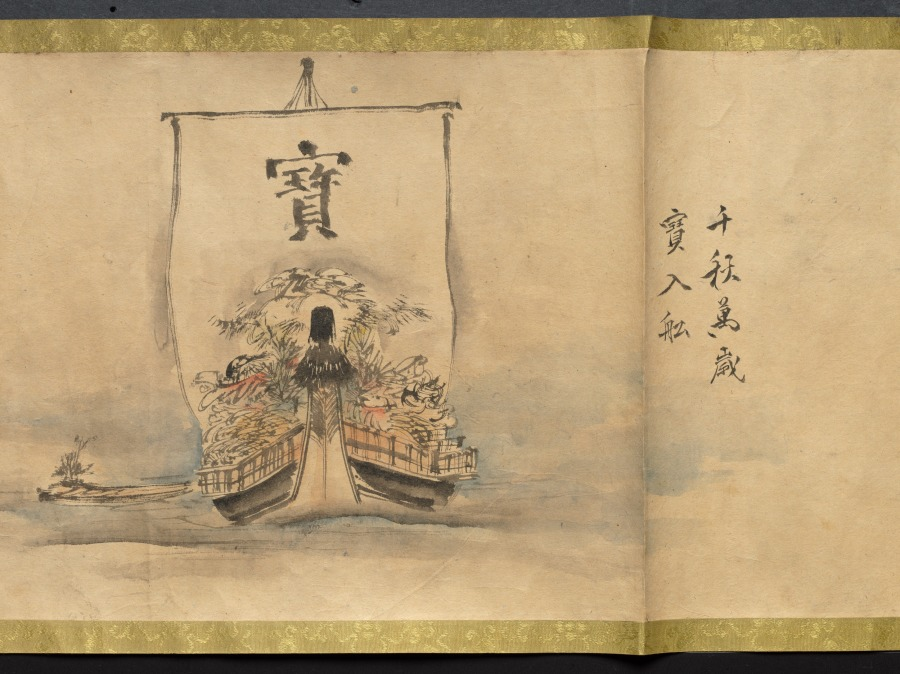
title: An Illustrated Marriage of Apparitions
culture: Japan, Edo period (1615–1868)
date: mid-1800s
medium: handscroll; ink and color on paper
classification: Painting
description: The matchmaking, engagement, wedding, and birth of the first child of two apparitions, or bakemono, literally "things that change," are illustrated in this whimsical, humorous handscroll. Japanese folklore abounds with such strange creatures, most famously represented in handscrolls featuring a procession of 100 supernatural monsters. Aside from a textual preface and cartouches indicating the content of the scenes, the tale is told visually. The artist and whereabouts of the original handscroll are unknown, but a number of other 19th-century copies by amateur painters exist in Japanese collections, attesting to its broad appeal.